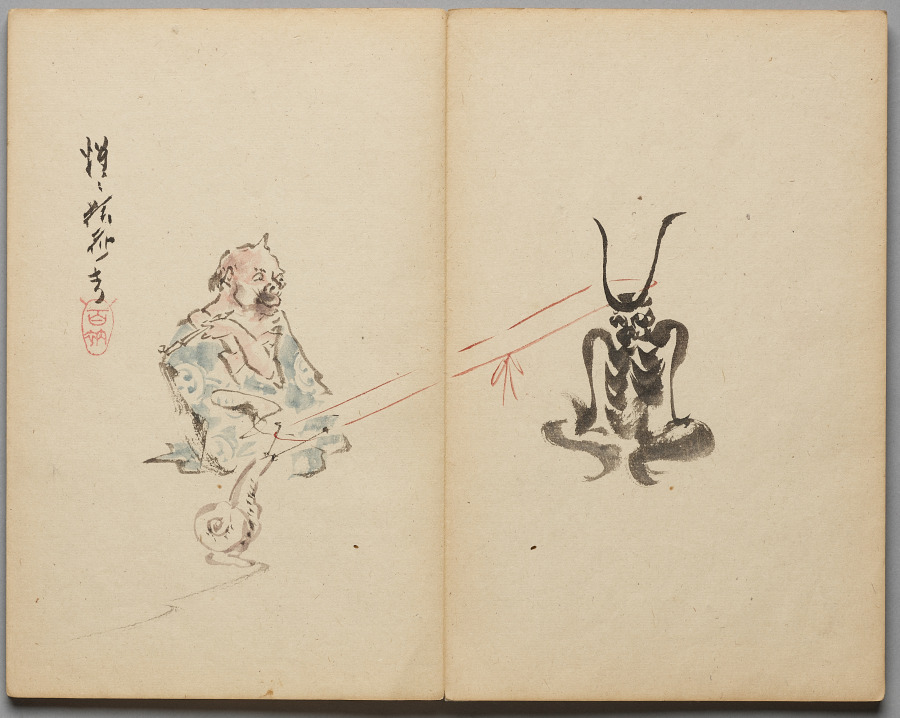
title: Snail Versus Demon from Sketch Album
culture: Japan, Edo period (1615–1868) to Meiji period (1868–1912)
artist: Kawanabe Kyōsai (Japanese, 1831–1889)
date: mid- to late 1800s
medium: Accordion-style book of 26 double-leaves; ink and color on paper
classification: Bound Volume